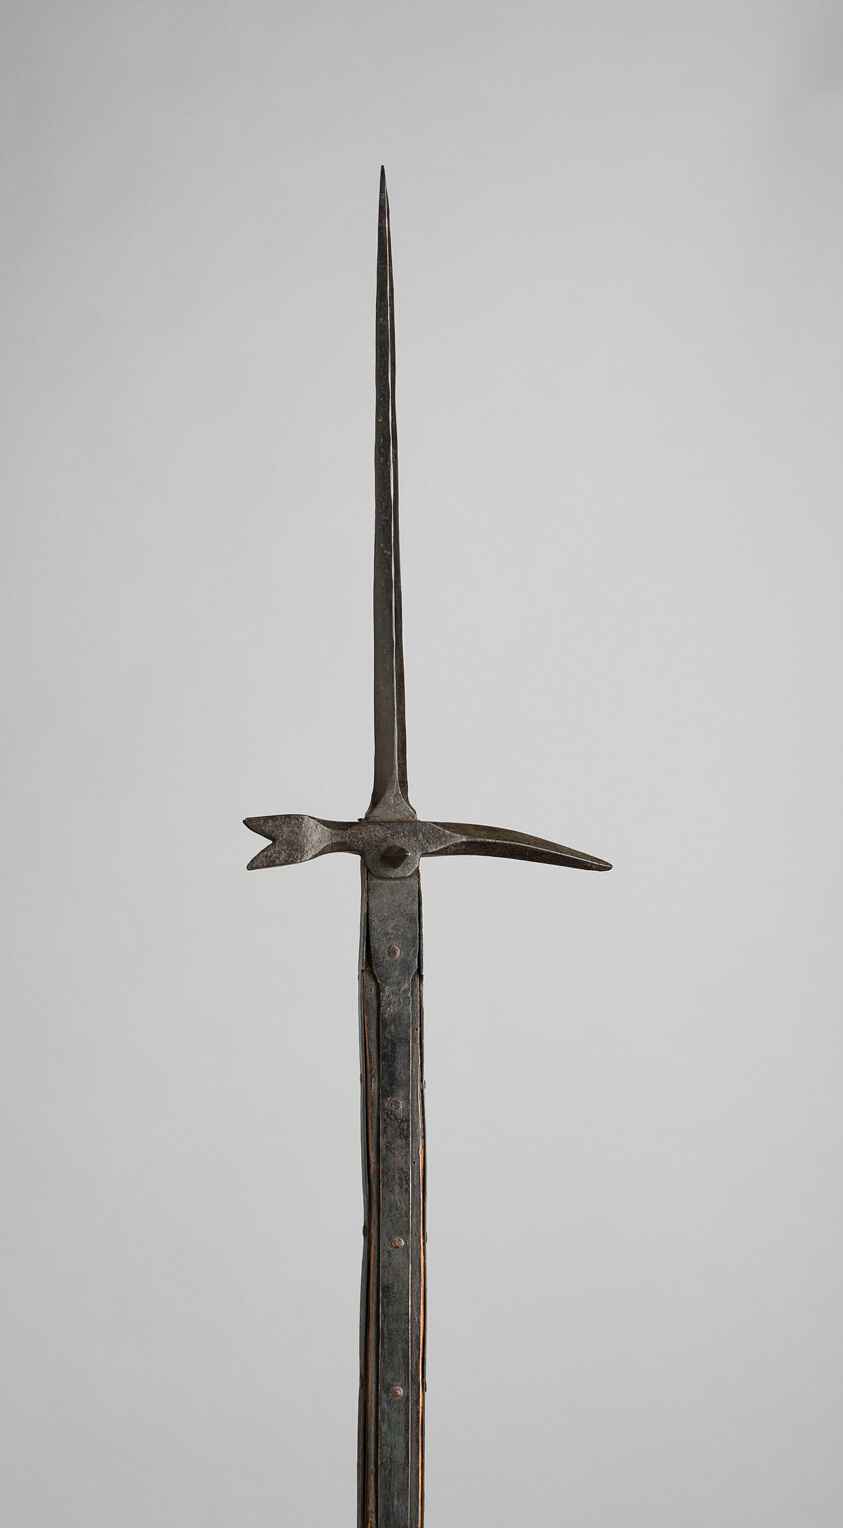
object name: Arms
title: Lucerne Hammer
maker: Swiss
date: 1600-50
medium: Steel, iron, and wood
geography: Switzerland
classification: edged weapon-staff; arms; arms and armor